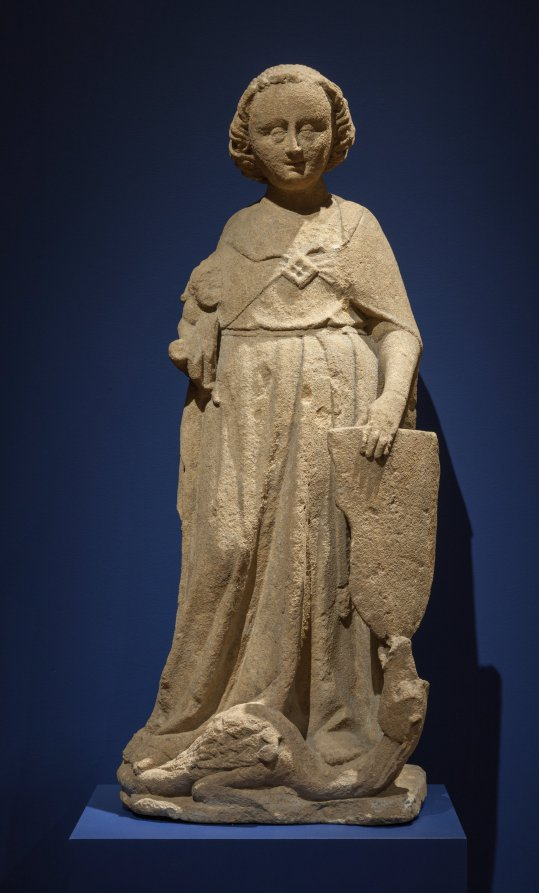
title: Saint Michael the Archangel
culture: Eastern France, Lorraine, 13th century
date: c. 1280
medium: fossiliferous limestone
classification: Sculpture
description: The Archangel Michael is shown here in his traditional role as the protector of souls who escorts the good into heaven. Though damaged, he holds the remnants of a small figure representing a human soul within his right arm. At his feet, the vanquished dragon symbolizes the saint’s defeat of evil in his struggle with the devil. This sculpture is believed to come from the cloister of the former Benedictine monastery of St.-Mihiel (dedicated to Saint Michael) in eastern France, near Verdun. Much of this abbey was destroyed during the French Revolution.